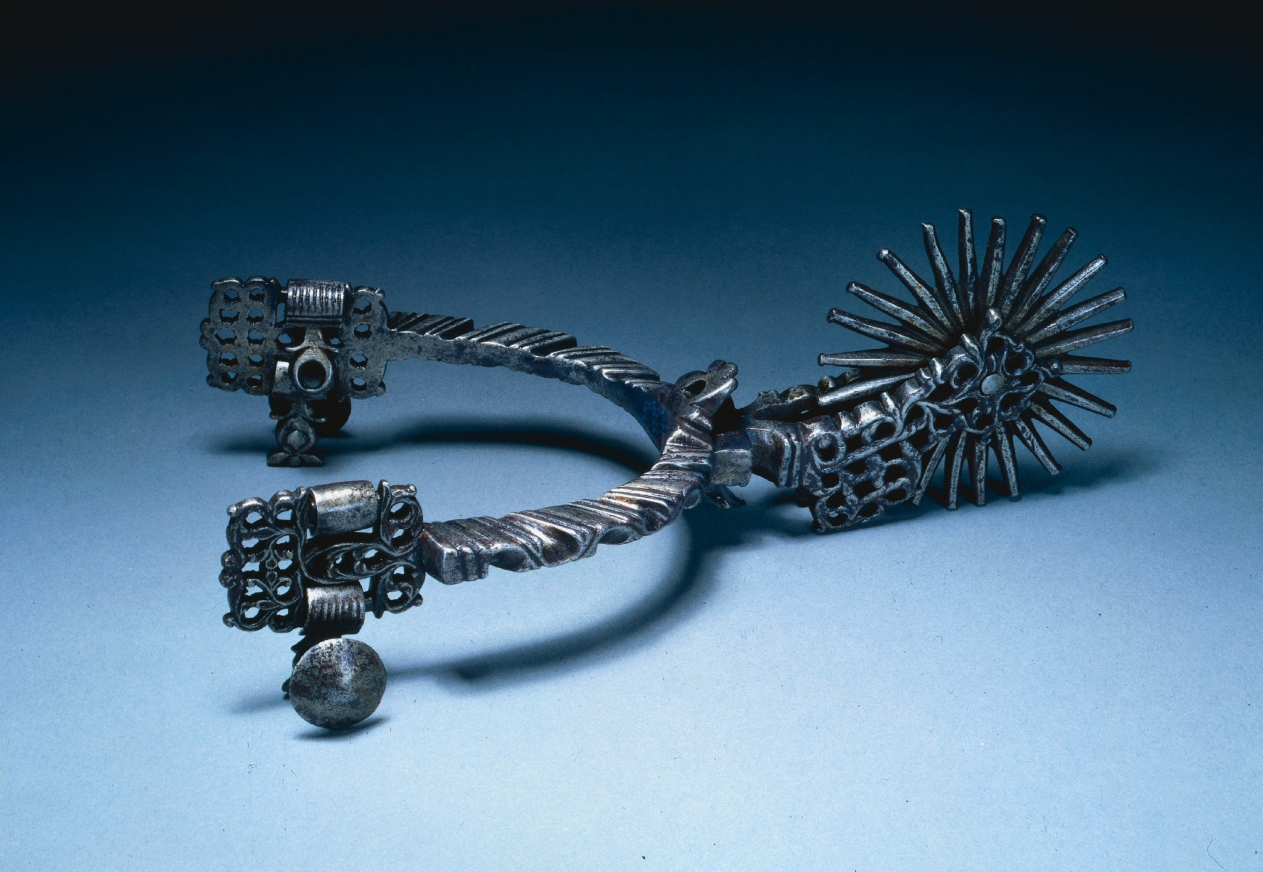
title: Rowel Spur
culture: Spain, early 18th Century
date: c. 1700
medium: steel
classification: Arms and Armor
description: Instead of a "prick" terminus at the neck, the rowel spur had a rotating wheel installed between two prongs. This type of spur gradually supplemented the prick spur as a safer and less severe alternative for the horse. Rowel spurs first appeared during the 1200s and were in general use by the 1300s.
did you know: Spurs became more than an equestrian tool, but a piece of male jewelry that would be worn even not when riding.